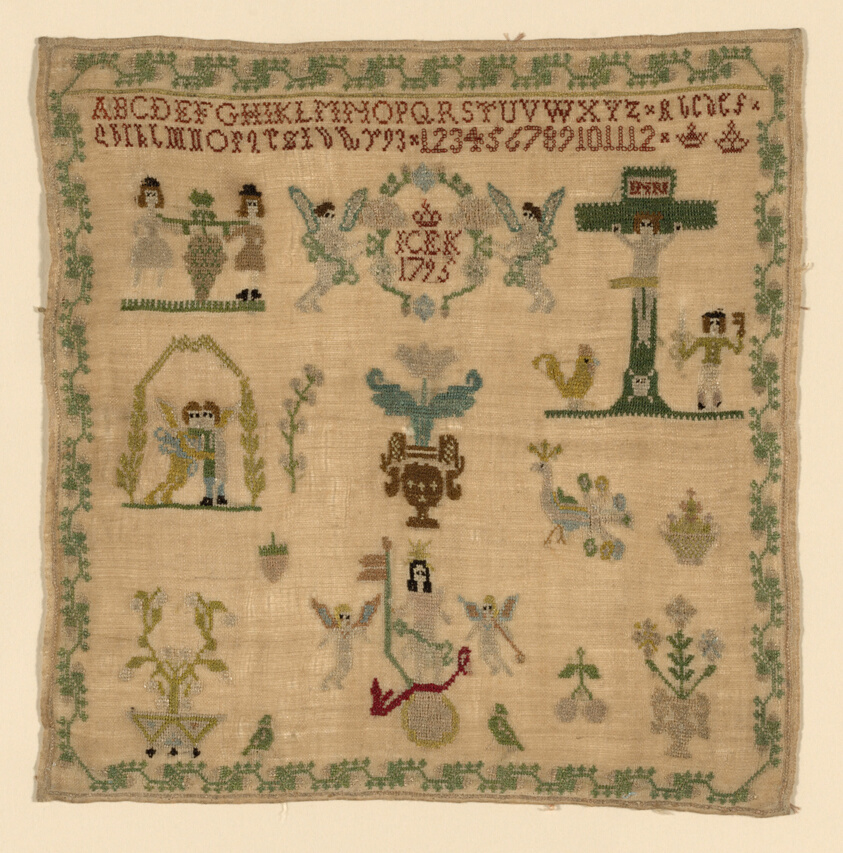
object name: Textile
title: Sampler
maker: Germany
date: 1795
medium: Linen and silk; embroidered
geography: Germany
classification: textile; needlework (visual works)